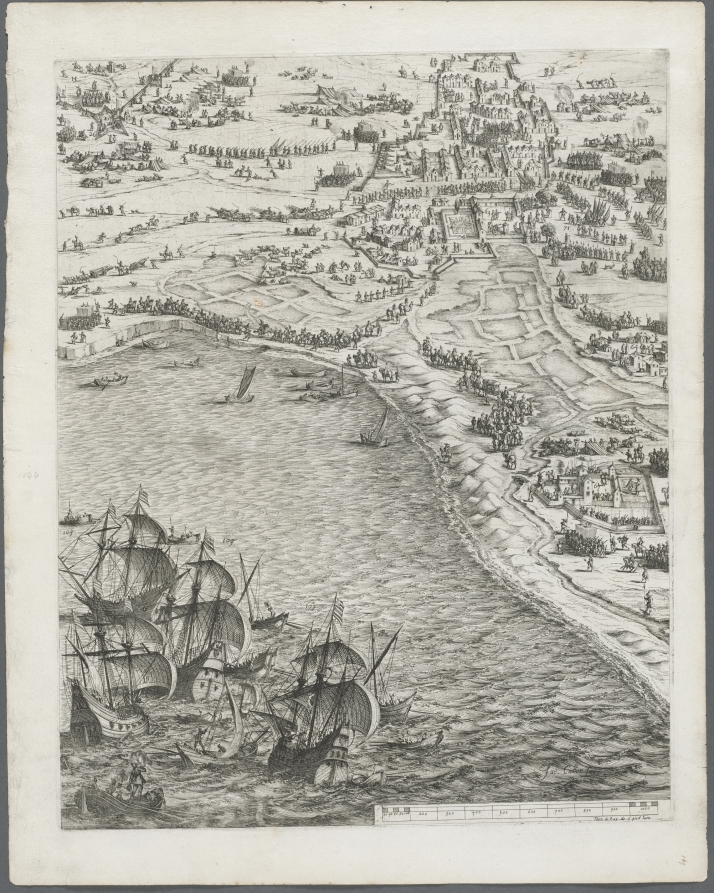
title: The Siege of La Rochelle: Plate 12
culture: France, 17th century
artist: Jacques Callot (French, 1592–1635)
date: 1628–1630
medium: etching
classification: Print